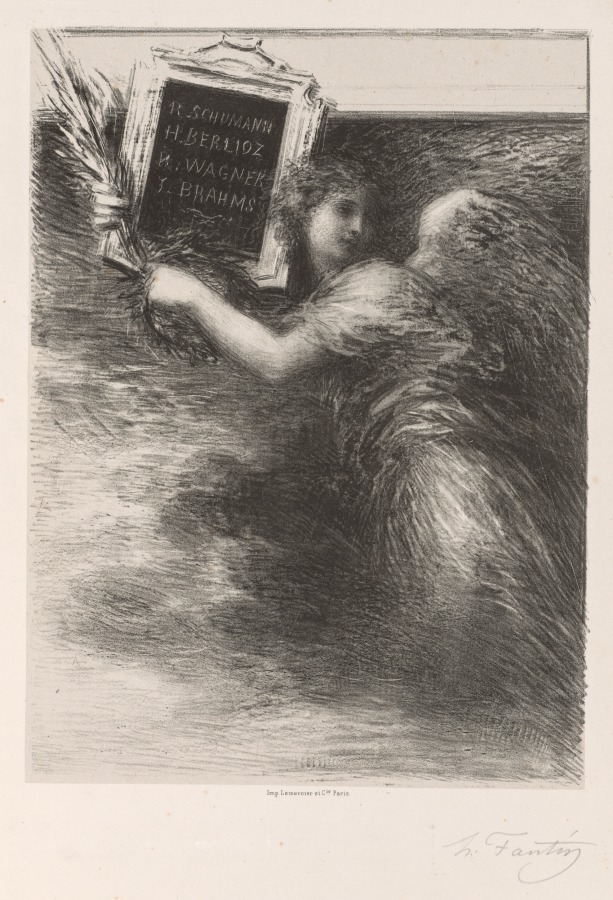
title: The Genius of Music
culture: France, 19th century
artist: Henri Fantin-Latour (French, 1836–1904)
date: 1881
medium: lithograph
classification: Print